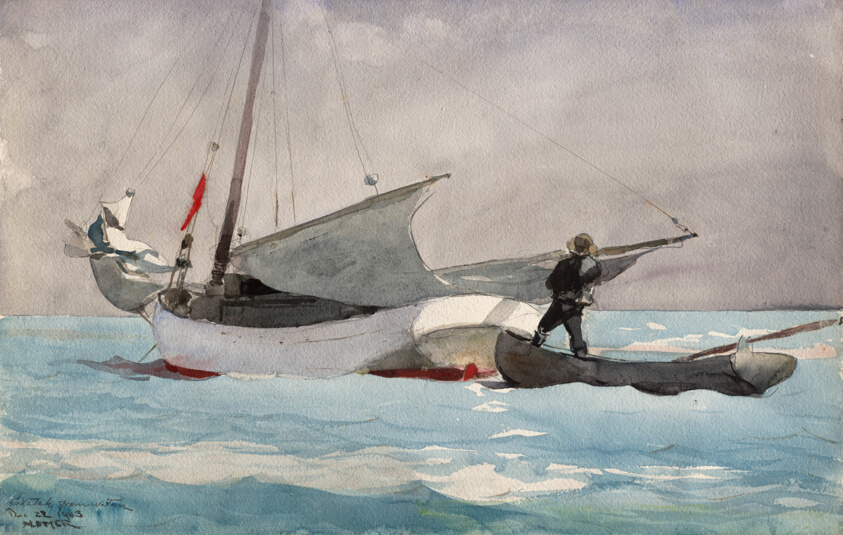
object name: Drawing and Watercolor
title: Stowing Sail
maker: Winslow Homer (American, 1836-1910)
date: 1903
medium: Transparent watercolor, with touches of opaque watercolor, rewetting, blotting, scraping and graphite, on thick, moderately textured (twill texture on verso), ivory wove paper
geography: United States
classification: watercolor; drawings (visual works); prints and drawing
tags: seascapes, people, boats, Century of Progress, world's fairs, Chicago World's Fairs